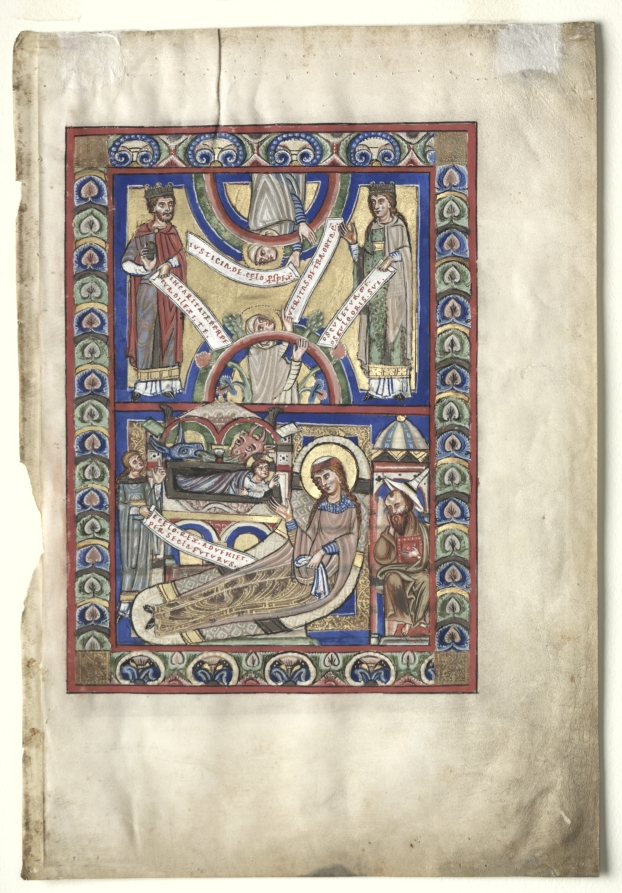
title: Single Leaf Excised from a Gospel Book: The Nativity (recto)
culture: Germany, Helmarshausen Abbey, 12th century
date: c. 1190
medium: ink, tempera, silver, and gold on vellum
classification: Manuscript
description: This leaf comes from a volume that is preserved in the Trier Cathedral Library in Germany (Codex 142).